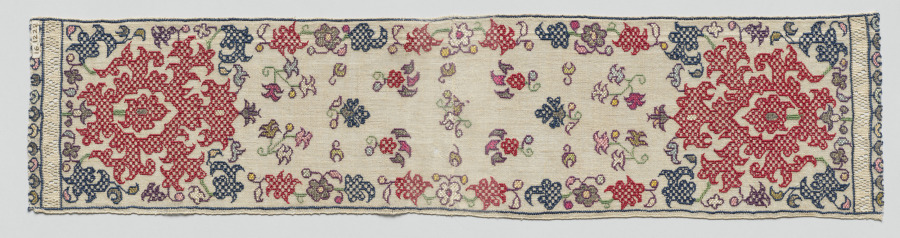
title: Part of a Cap (beniqa)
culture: Africa, North Africa, Algeria, Algerian embroiderer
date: 1700s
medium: Linen, silk, metal, dye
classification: Embroidery